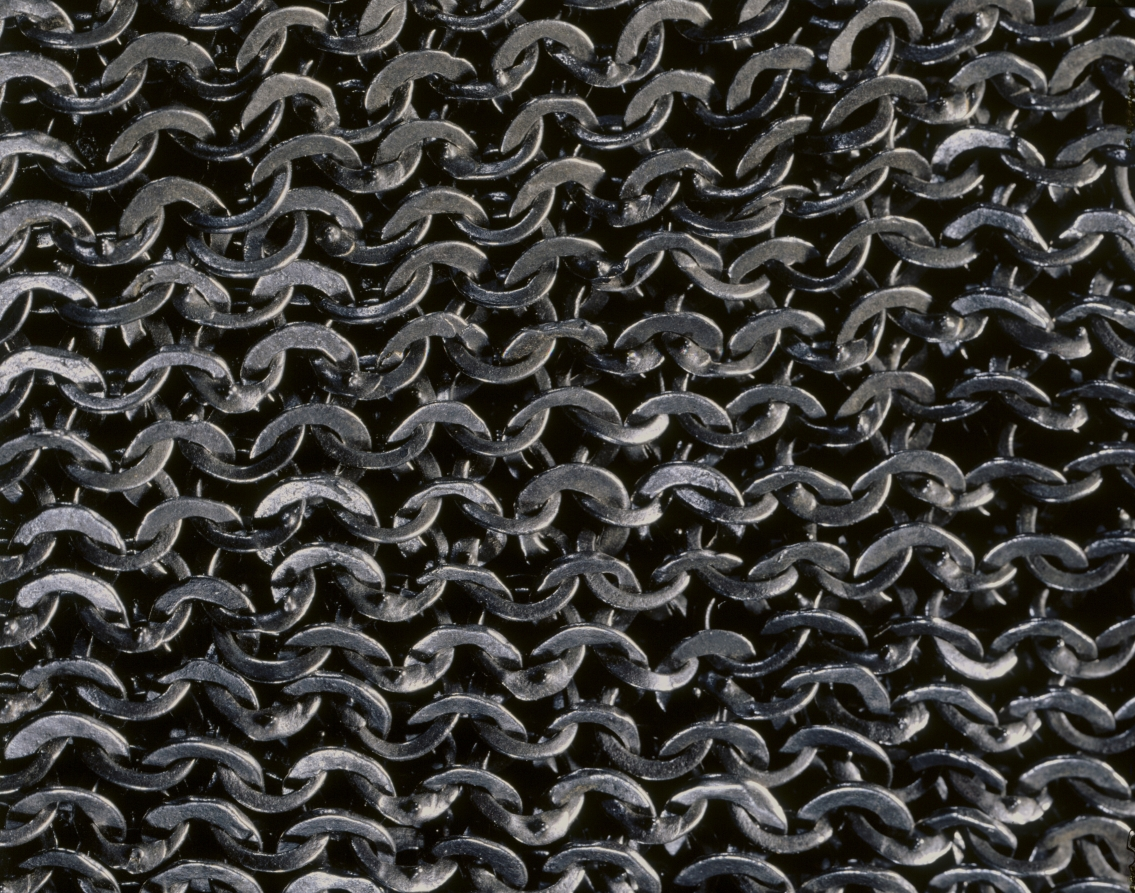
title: Hauberk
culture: Germany (?)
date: c. 1400–1450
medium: steel and brass rings, riveted with modern buckles and straps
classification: Arms and Armor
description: Mail armor was the predominant form of metal body defense for European knights until about 1350. The term derives from the Old French word maille (mesh), implying a protective textile. Each mail garment was constructed of small linked metal rings and "woven" for a specific part of the body. Mail for the torso is a hauberk and typically reached mid-thigh.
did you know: Mail was expensive to make and generally only available to warriors of noble birth unless it could be obtained as war booty.